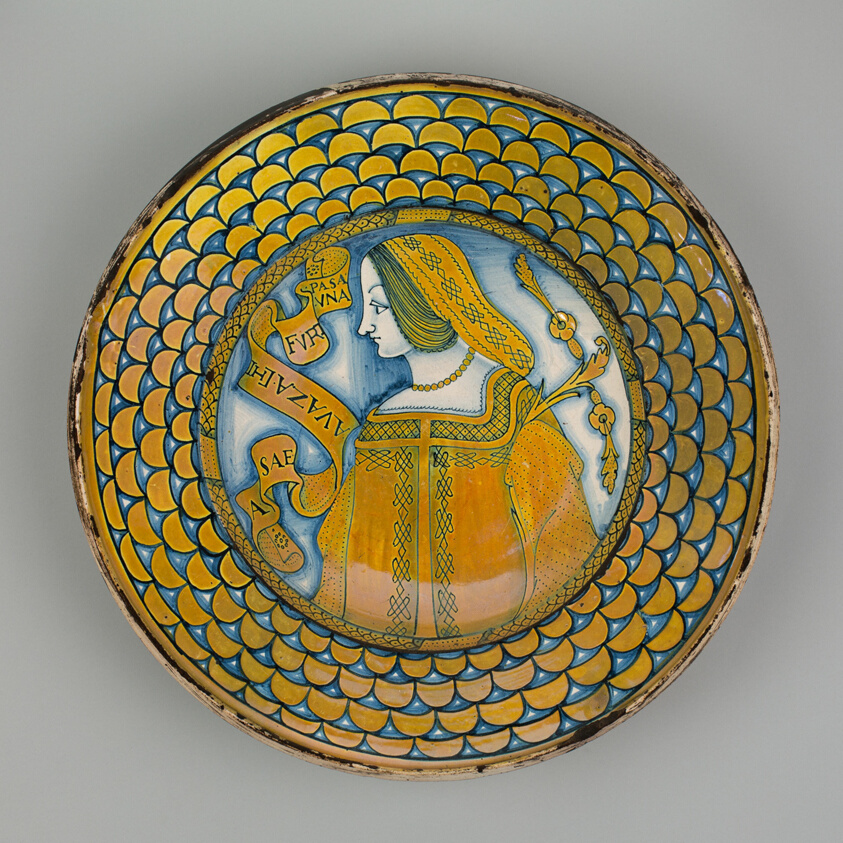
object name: Ceramics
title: Display Plate with Female Bust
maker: Italian, Deruta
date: 1500/1530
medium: Tin-glazed earthenware with copper luster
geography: Deruta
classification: earthenware; european decorative arts; ceramics; decorative arts